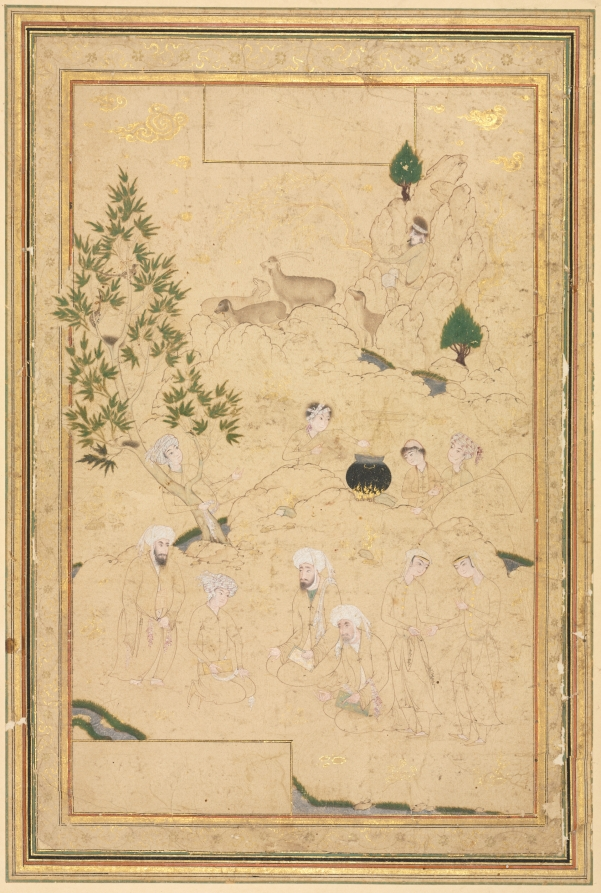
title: Picnic in the Mountains; Single Page Illustration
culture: Iran, Qazvin, Safavid period (1501-1722)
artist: style of Muhammadi (Iranian)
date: c. 1550–1600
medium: opaque watercolor, ink, and gold on paper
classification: Manuscript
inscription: script: none (cartouches for calligraphy are empty)